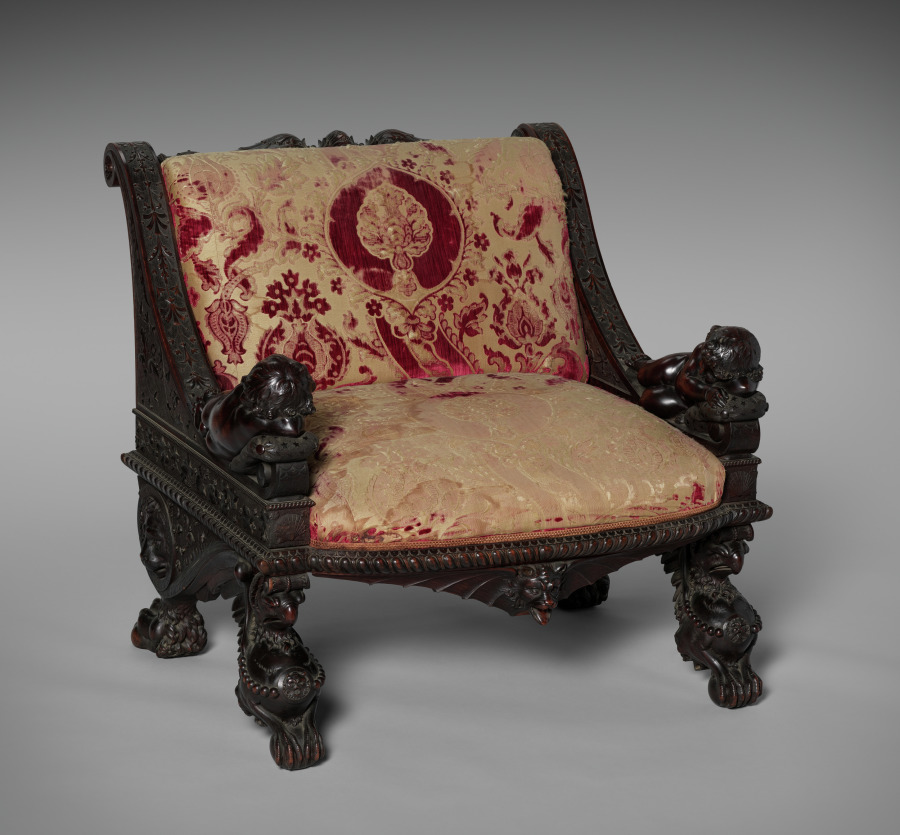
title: Armchair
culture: Italy, Florence, 19th century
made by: Luigi Frullini (Italian, 1839–1897)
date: 1876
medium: walnut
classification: Furniture and woodwork